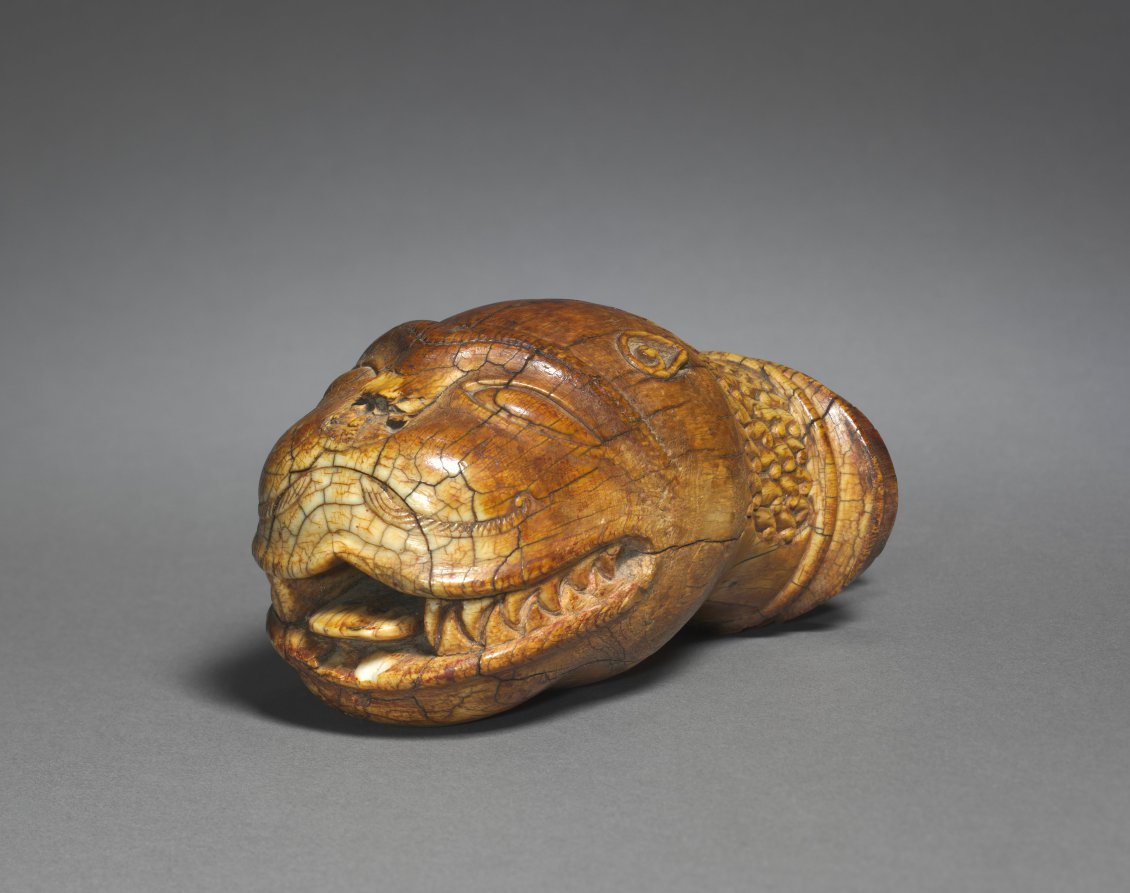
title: Lion's Head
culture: India, Mughal period (1526-1756)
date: 17th Century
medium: ivory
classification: Ivory